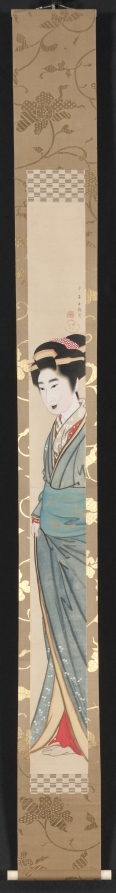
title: Courtesan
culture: Japan, Edo period (1615–1868)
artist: Gion Seitoku (Japanese, active late 1700s–early 1800s)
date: early 1800s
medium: hanging scroll, pillar painting; ink and color paper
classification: Painting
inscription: Artist's signature and two seals upper right side.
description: This narrow hanging scroll, known as a pillar painting, is similar to the format of Shigemasa’s Two Beauties (see CMA 1985.274).